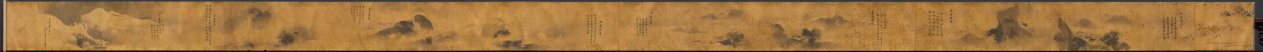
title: Eight Views of Xiao-Xiang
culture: Japan, Edo period (1615–1868)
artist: Kano Tan’yū (Japanese, 1602–1674)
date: 1615–1868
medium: handscroll; ink on silk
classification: Painting